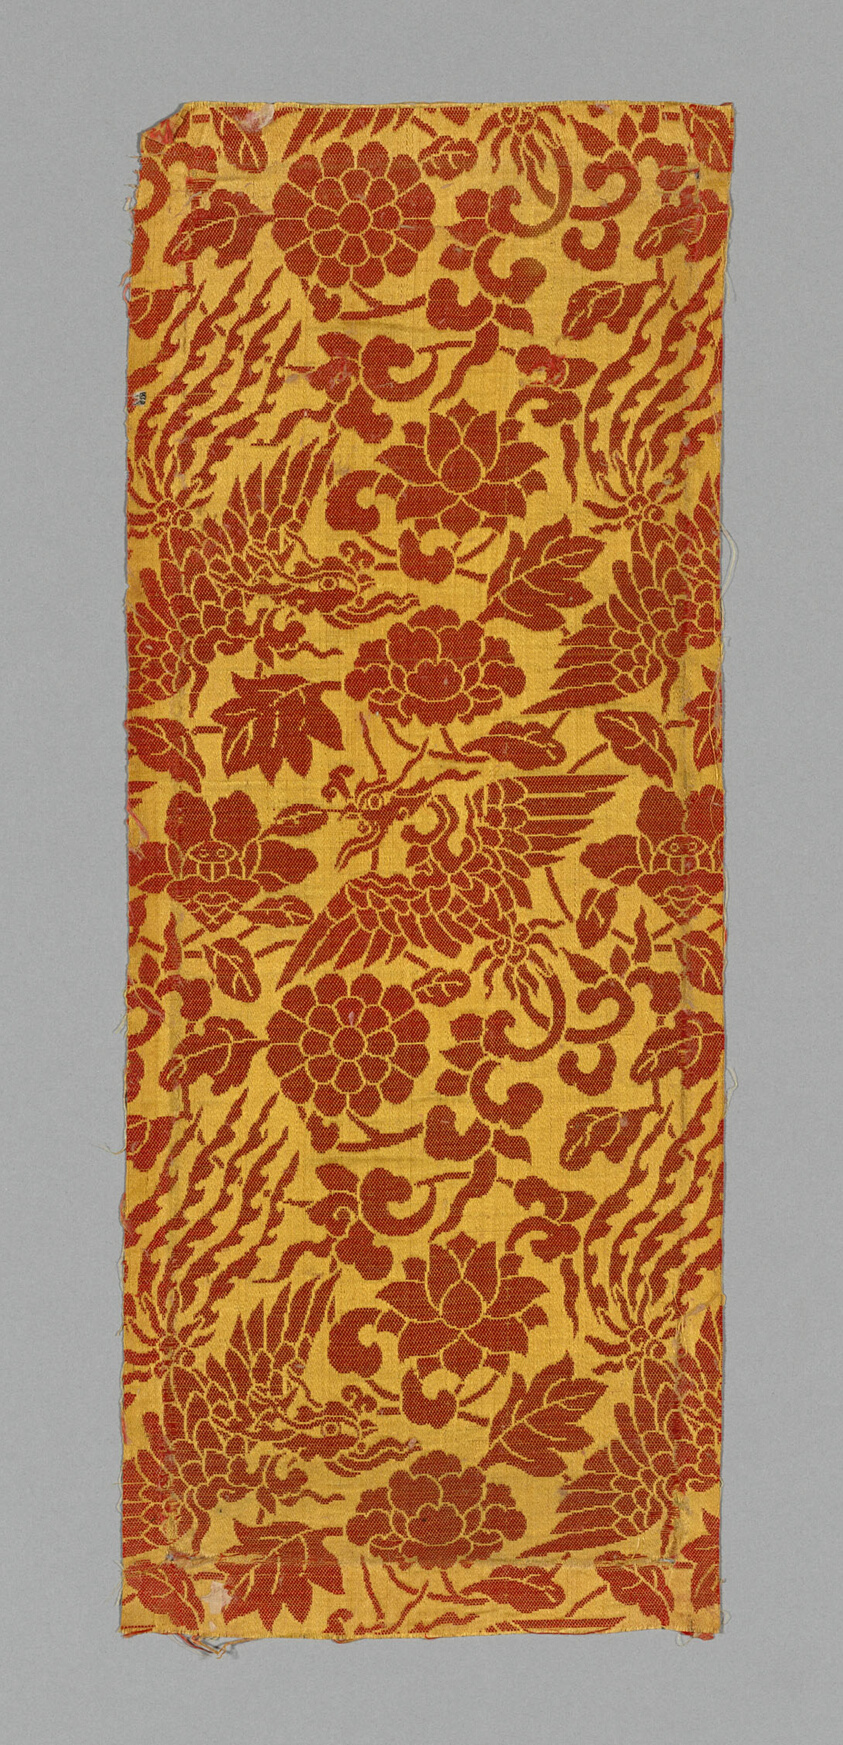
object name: Textile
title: Sutra Cover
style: ming, Chinese (culture or style), East Asian, asian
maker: China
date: Ming dynasty (1368–1644), c. 1590's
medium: Silk, warp-float faced 4:1 satin weave with supplementary patterning wefts bound in weft-float faced 1:4 satin interlacings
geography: China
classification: textile; weaving